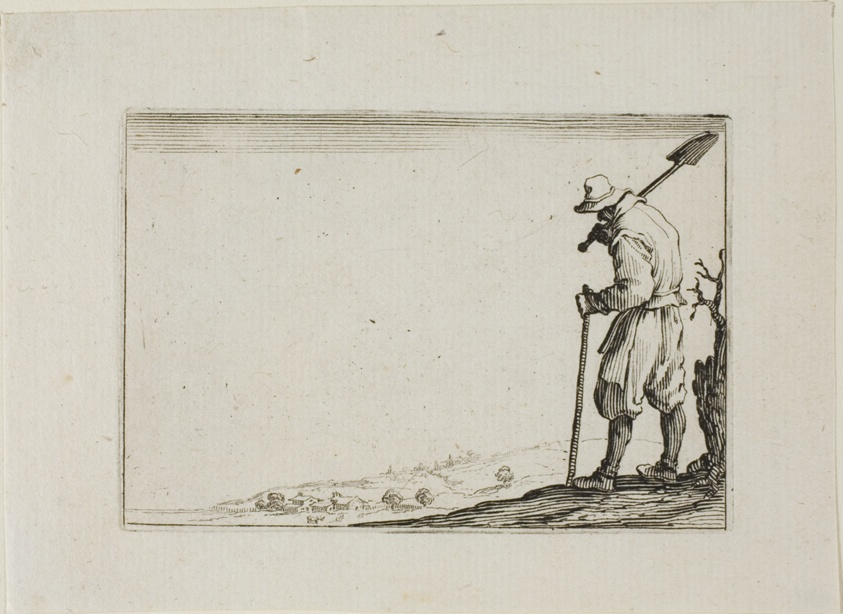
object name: Print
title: The Peasant Carrying his Shovel on his Shoulder, from The Caprices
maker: Jacques Callot (French, 1592-1635)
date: c. 1622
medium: Etching on ivory laid paper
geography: France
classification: etching; print; prints and drawing